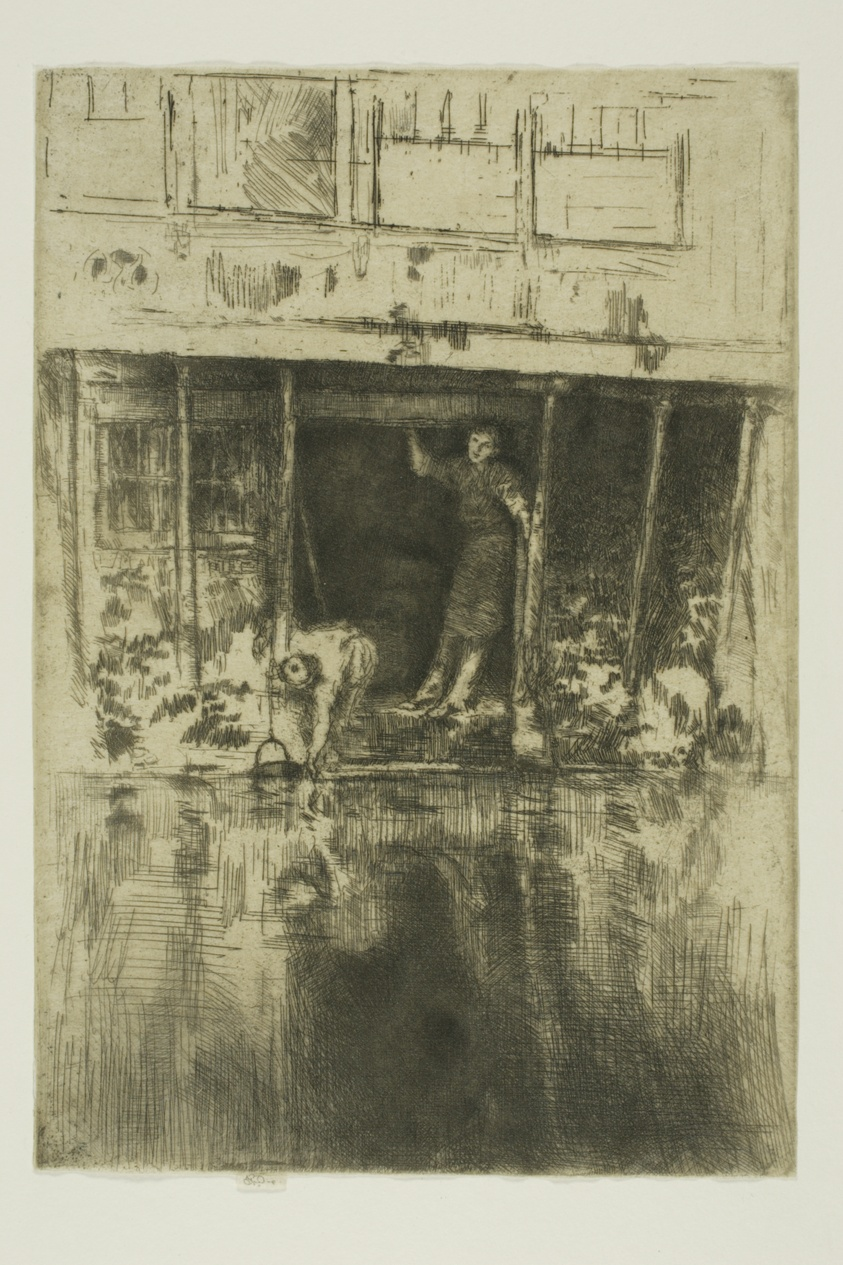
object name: Print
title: The Pierrot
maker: James McNeill Whistler (American, 1834-1903)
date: 1889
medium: Etching and drypoint with foul biting in black ink on cream Japanese paper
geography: United States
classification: etching; drypoint; print; prints and drawing; foul biting; paper